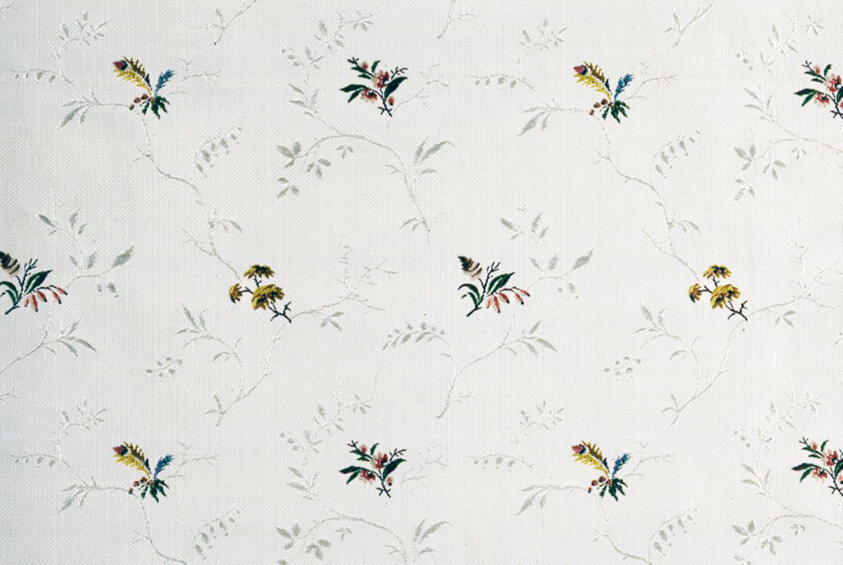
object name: Textile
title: Panel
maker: England, Spitalfields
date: 1777/80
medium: Silk, plain weave with supplementary patterning warps, supplementary brocading wefts, and self-patterned by ground weft floats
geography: Spitalfields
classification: textile; weaving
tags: fashion